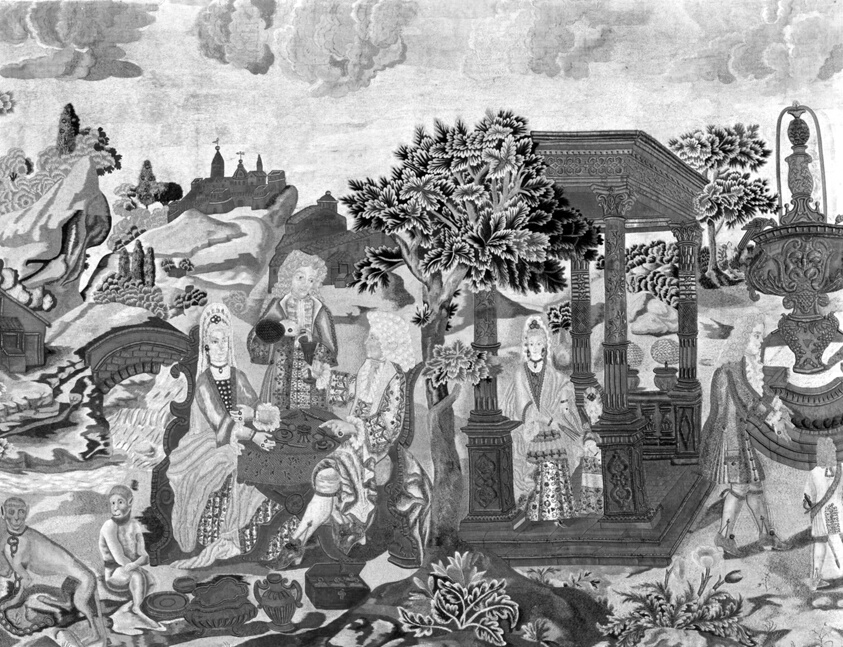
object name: Textile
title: Panel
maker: Portugal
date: 17th century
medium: Silk, satin weave, embroidered in silk and metal thread, studded with stones and pearls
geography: Portugal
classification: textile; needlework (visual works)